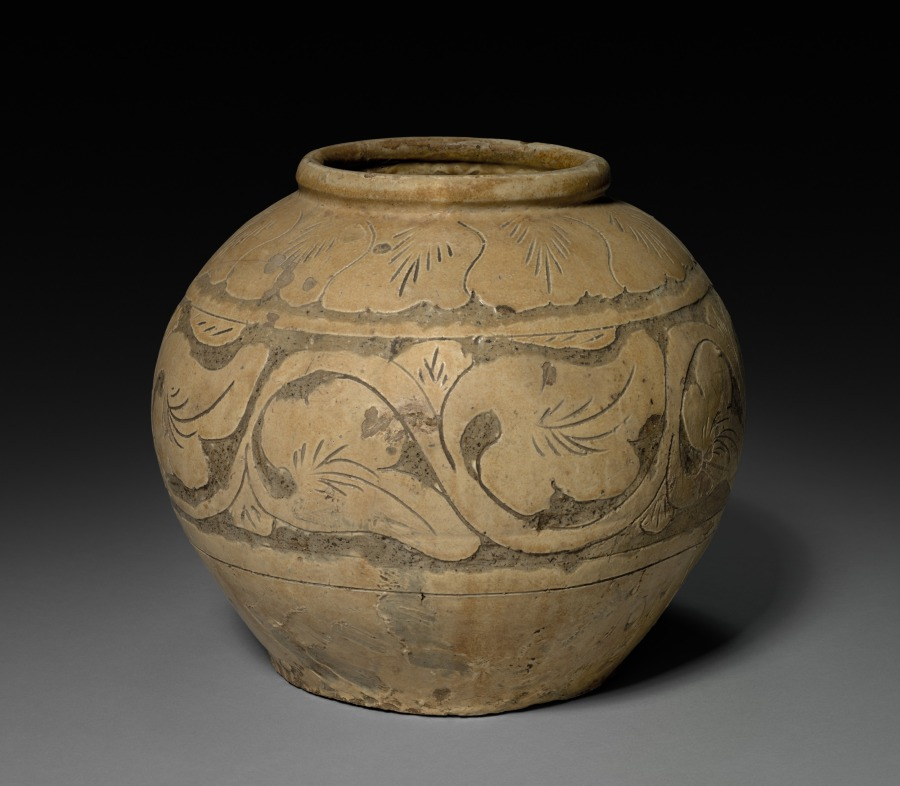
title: Jar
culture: China, Manchuria, Liao dynasty (916-1125)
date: 907–1125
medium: Glazed stoneware, Cizhou ware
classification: Ceramic